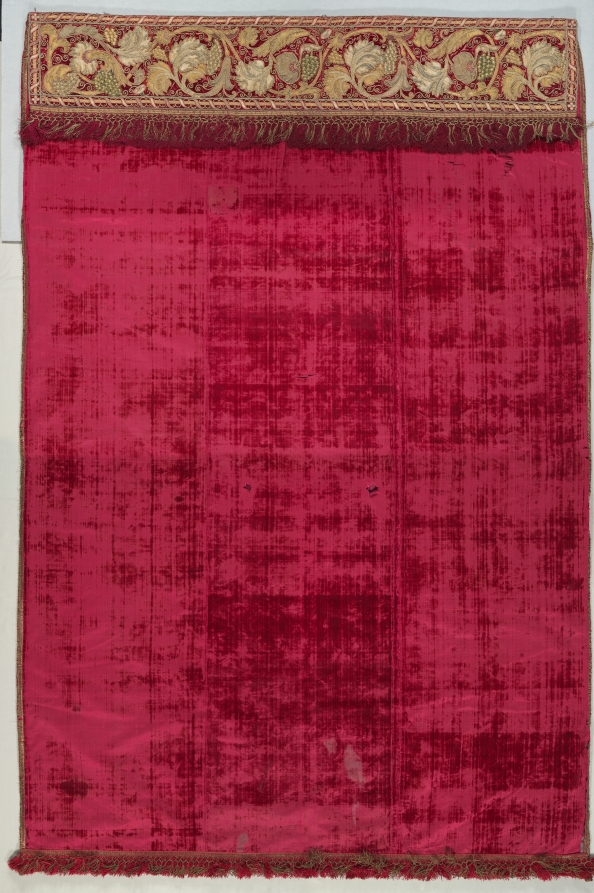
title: Curtain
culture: Italy, 17th century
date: 1600s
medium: silk velvet with metal thread embroidered valance and passementerie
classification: Embroidery